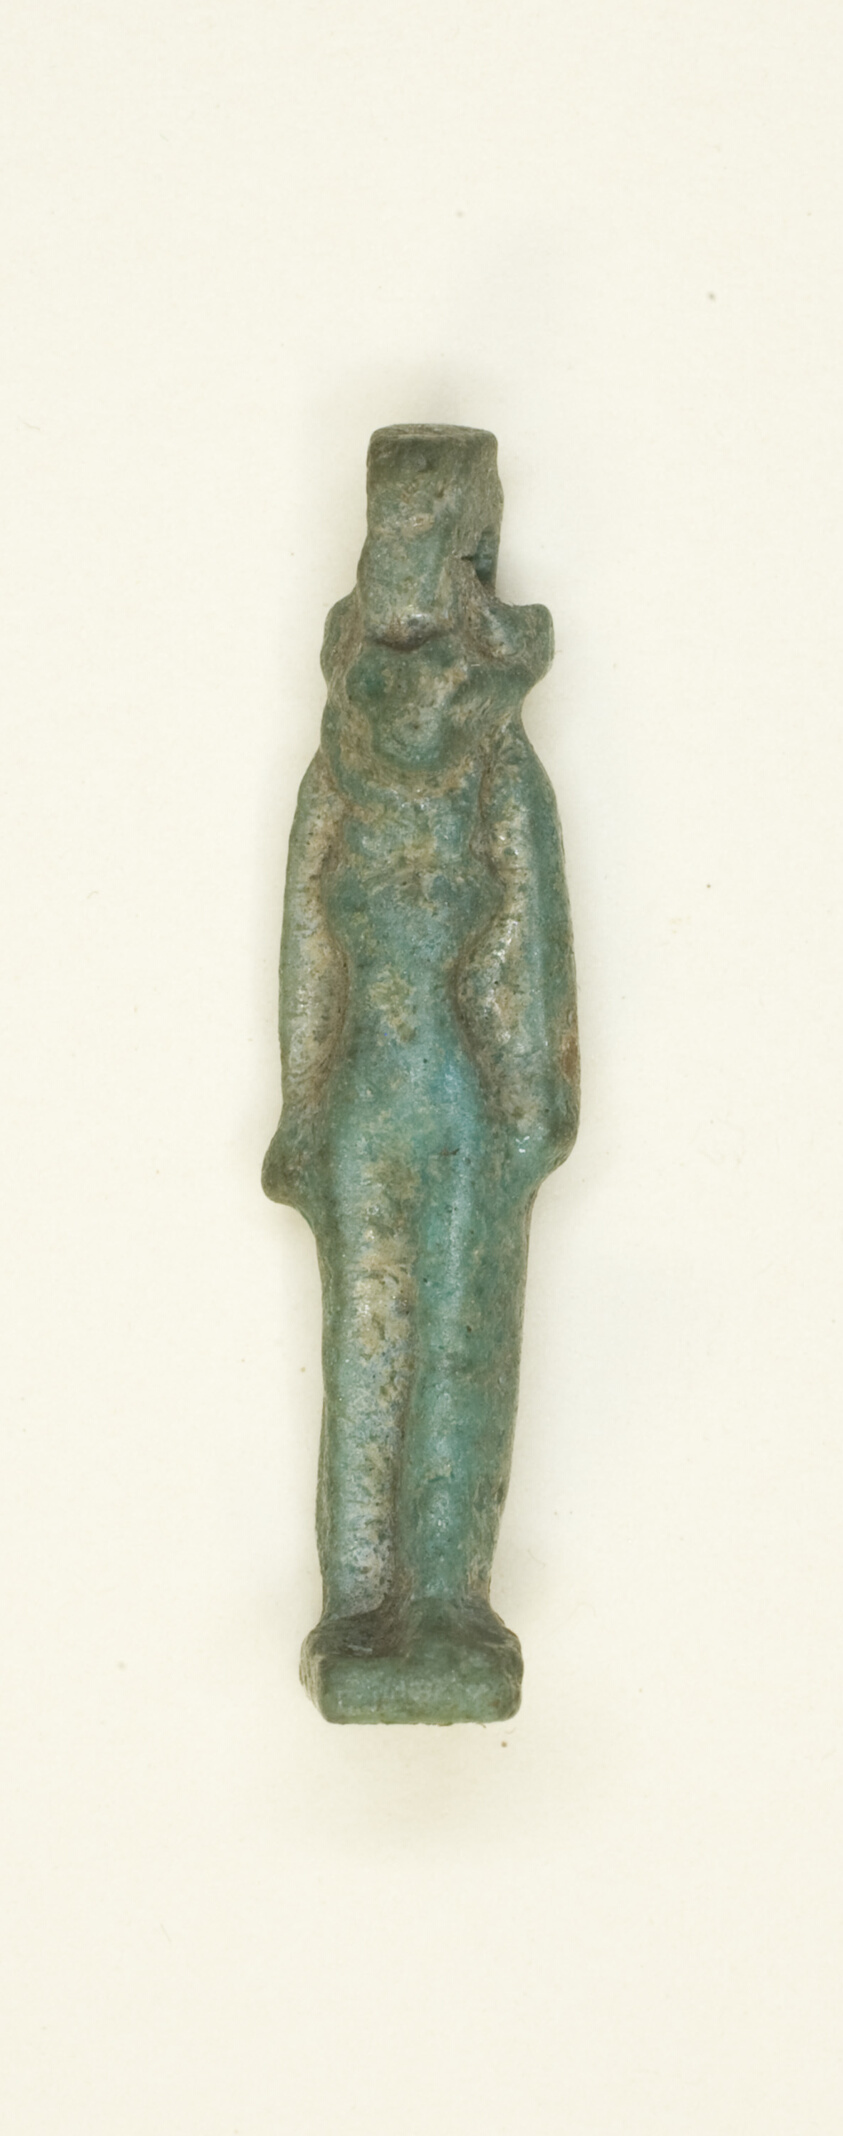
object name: Costume and Accessories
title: Amulet of a Lion-Headed Goddess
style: egyptian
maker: Egyptian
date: Third Intermediate Period–Late Period, Dynasties 21–31 (about 1069–332 BCE)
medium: Faience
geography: Egypt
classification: amulet; jewelry; ceramics; ancient art; costume; faïence (composite material)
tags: goddesses